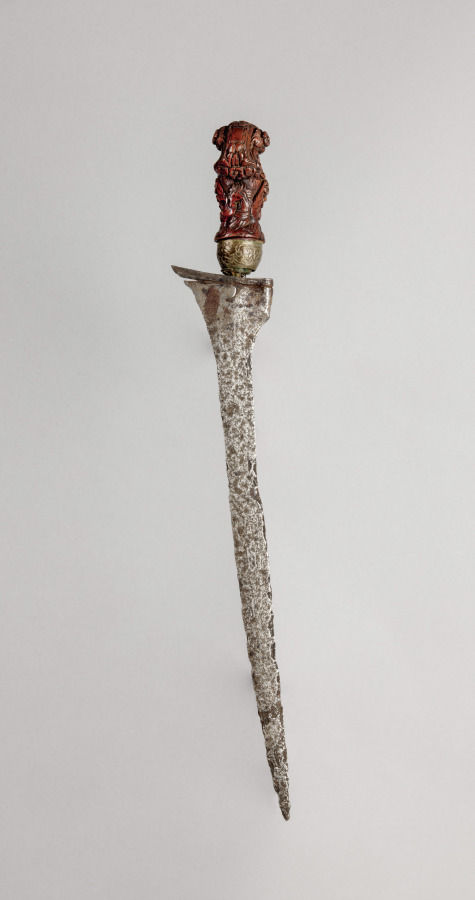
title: Sword (Kris)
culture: Java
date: 1800s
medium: iron with carved wooden handle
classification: Arms and Armor